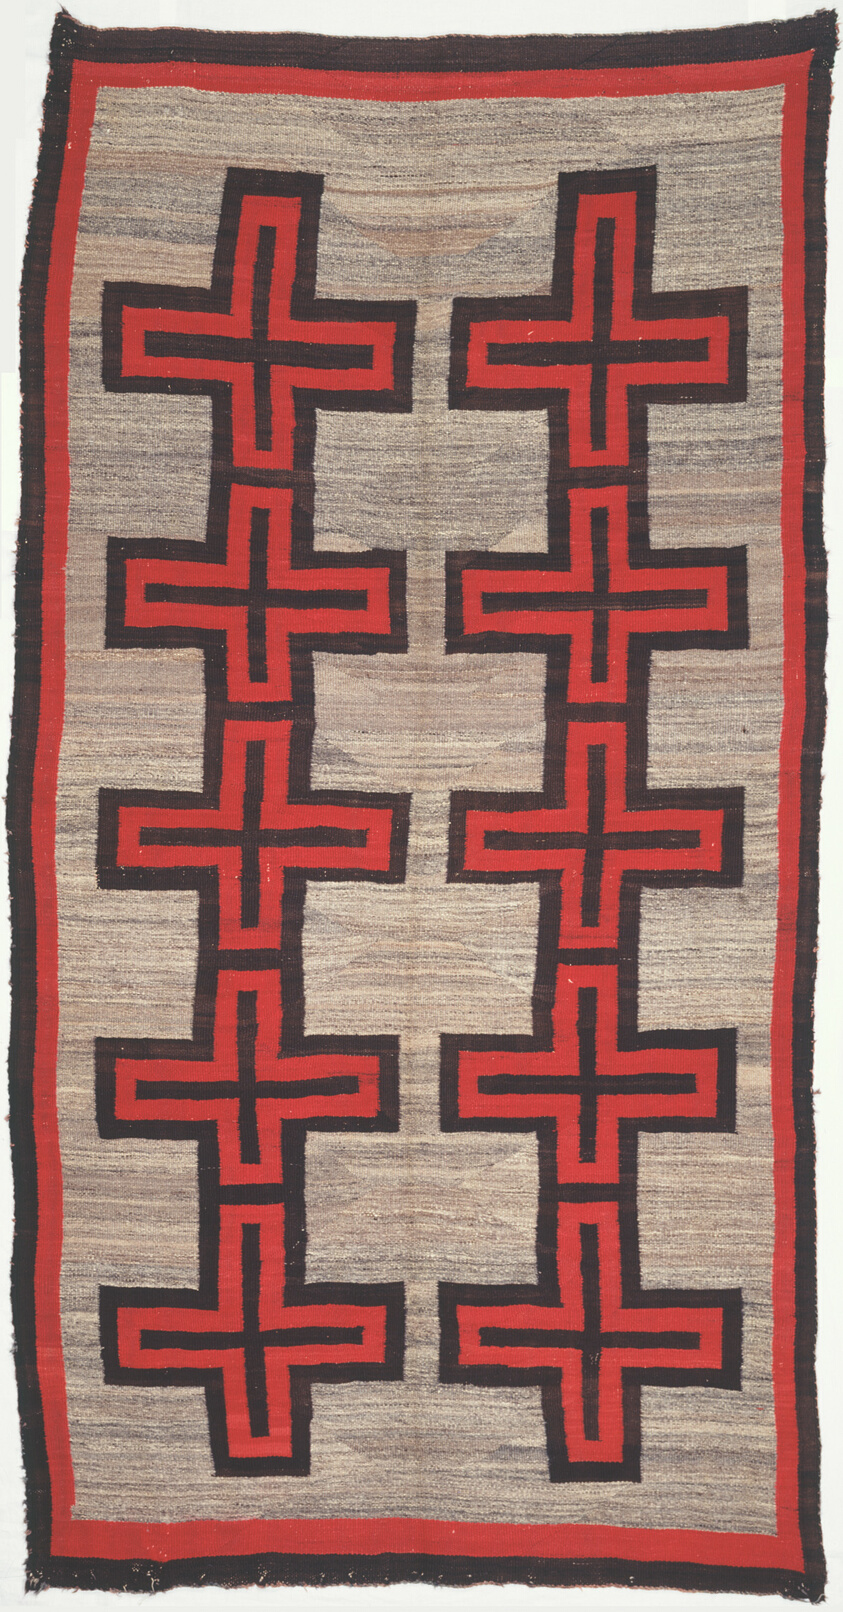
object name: Textile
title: Blanket or Rug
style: navajo, native american, americas, indigenous, north american, native north american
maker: Navajo (Diné) (Ganado area, Arizona, United States)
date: c. 1900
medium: Wool, dovetailed tapestry weave; twined edges and ends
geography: Navajo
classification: textile; weaving